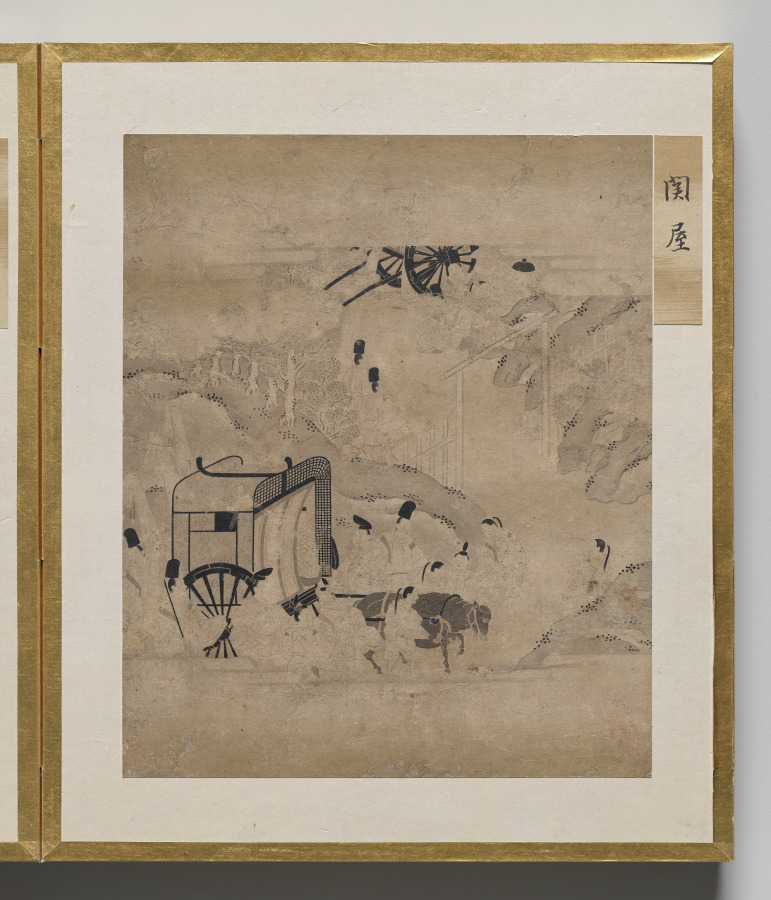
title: Gatehouse from Album of Illustrations for the Tale of Genji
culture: Japan, Edo period (1615–1868)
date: 1600s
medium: painting in an accordion-style album; ink, light color, and gold on paper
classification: Bound Volume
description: This album contains illustrations for the classic literary work the Tale of Genji, authored in the 1000s by Murasaki Shikibu, an aristocrat of the Heian period (794–1185) court. The scenes are painted in the “white drawing” (hakubyō) mode, in which a fine ink line is used to depict figures and spaces with great subtlety, punctuated only occasionally by traces of red pigment for a character’s lips, a detail of a garment, or a decorative element. These two scenes illustrate episodes from the chapters “Thin Veil of Cloud” (Usugumo) and “Barrier Gate” (Sekiya).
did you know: The illustrations are identified by chapter title in cartouches to the upper right of the paintings.